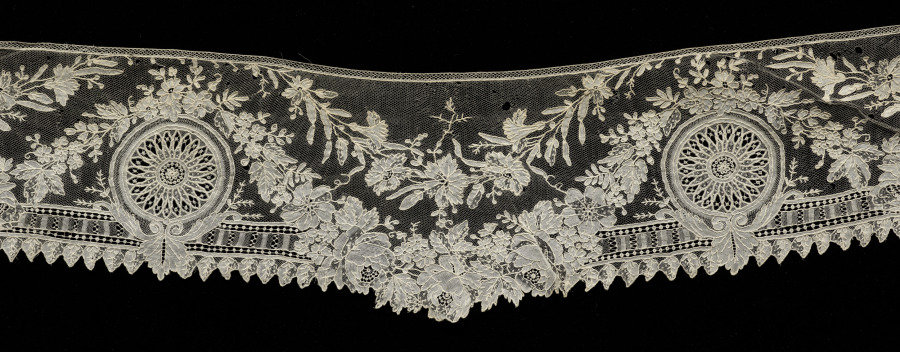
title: Lace Strip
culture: Belgium, Brussels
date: 1840–60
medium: Needle lace (point de gaze)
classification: Lace